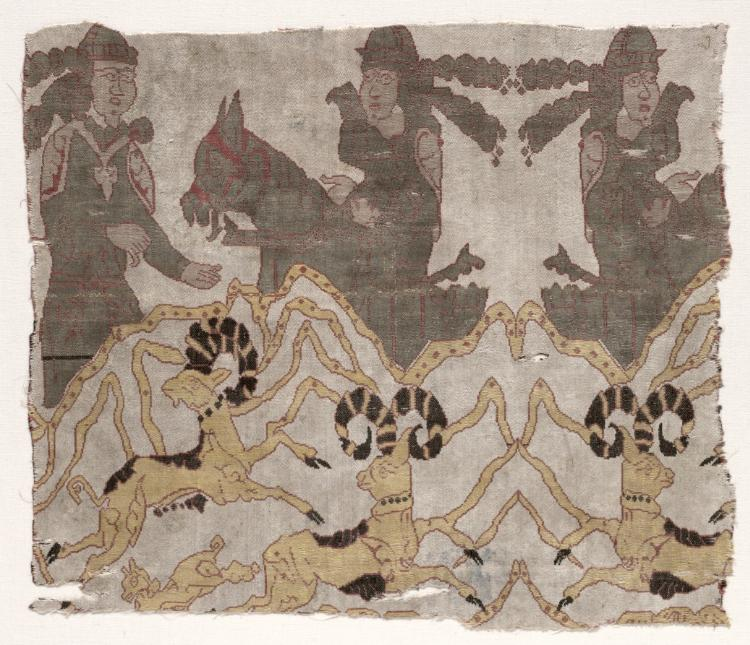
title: Fragment with Landscape, Hunters, and Ibexes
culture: Iran, style of the Abbasid period (750–1258)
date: before 1982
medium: Silk: lampas weave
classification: Textile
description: Ibexes romp in a landscape of hills on the lower half of this silk fragment. Above are a pair of addorsed horsemen and a standing male figure on the left. All wear tunics with shoulder ornaments and hats with flying ribbons.